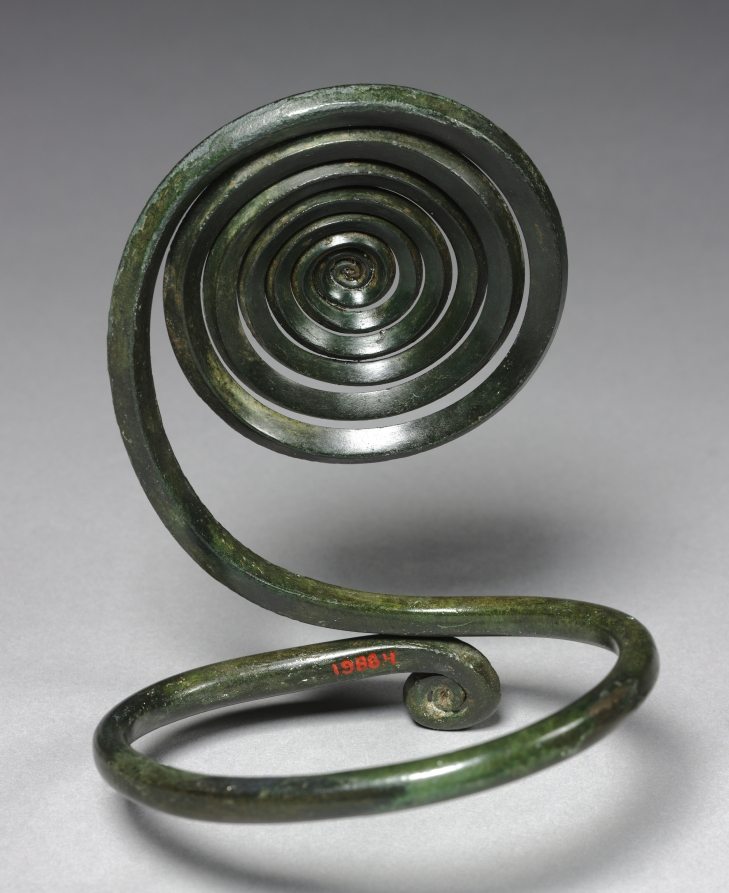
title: Spiral Armilla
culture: Central Europe, Bronze Age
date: c. 1500 BCE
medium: bronze, wrought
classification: Metalwork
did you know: This armilla or arm ornament has a ridge along the spine, ending in a large spiral at one end.